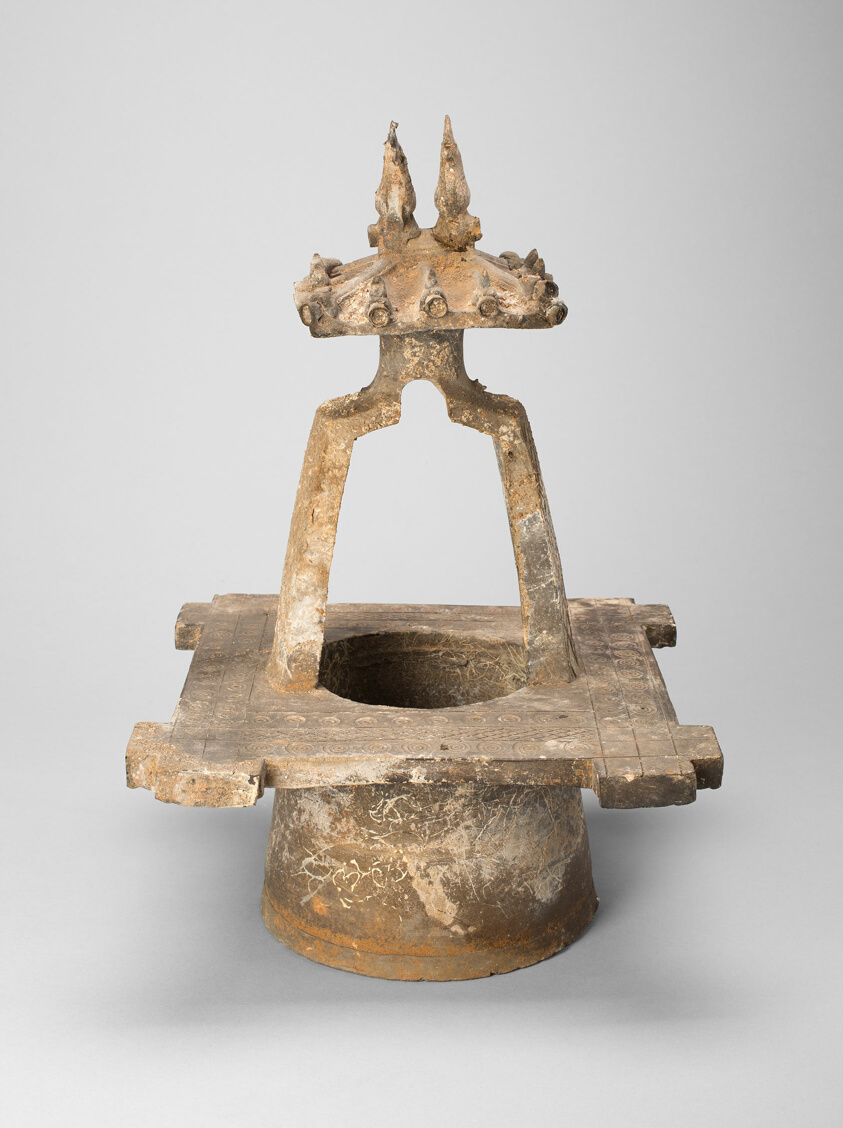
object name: Sculpture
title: Model of a Wellhead with Roosters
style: Chinese (culture or style)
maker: China; probably Henan province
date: Han dynasty (206 BCE–220 CE), 100 BCE–100 CE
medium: Gray earthenware with molded, incised, and stamped decoration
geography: China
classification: earthenware; ceramics; sculpture; asian art